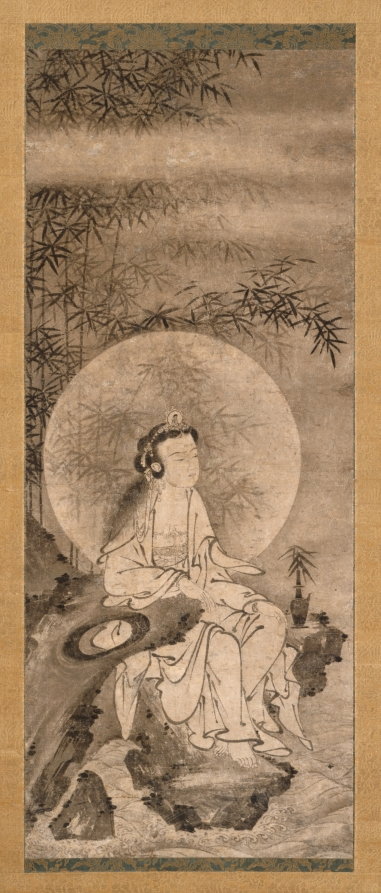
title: White-Robed Guanyin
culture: China, Southern Song dynasty (1127-1279)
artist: attributed to Zhang Yuehu (Chinese, active 1200s)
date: late 1200s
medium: Hanging scroll; ink on paper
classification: Painting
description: The figure here sits on a rocky elevation representing Potalaka in the Southern Sea, Avalokitesvara’s island home. A vase with a bamboo sprig holds pure water, the nectar of life. Bamboo shines through the figure’s halo, a way of seeing the illusionary world through the Buddhist truth. Avalokitesvara (Guanyin in Chinese), the bodhisattva of compassion, was integrated into the Chan Buddhist canon of venerated beings. In this context, the bodhisattva is often depicted in its female manifestation as the White-Robed Guanyin. The worship of the feminine White-Robed Guanyin has its origins on Mount Tianzhu in Hangzhou, where Qian Liu (852–932), ruler of the Wuyue kingdom, established the Upper Tianzhu Monastery to venerate her image.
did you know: As an artist, Zhang Yuehu was better known in Japan than in his own country.